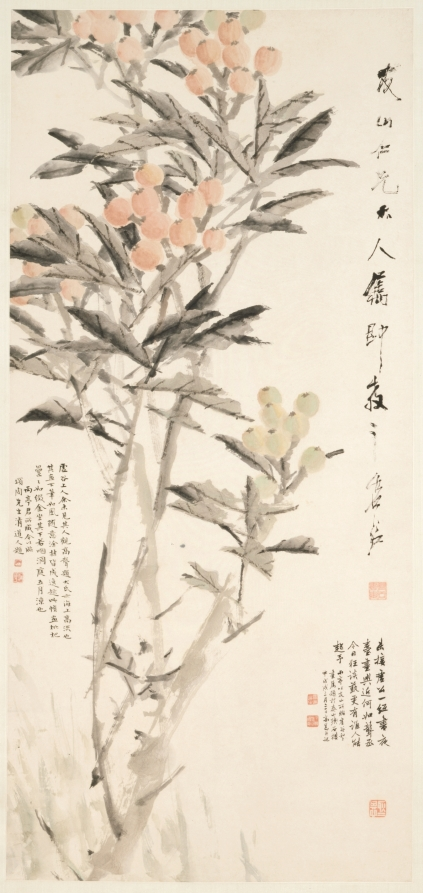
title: Pipa (Loquats)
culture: China, Yangzhou, Qing dynasty (1644-1911)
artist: Xugu (Chinese, 1823–1896)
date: c. 1888–89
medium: Hanging scroll; ink and color on paper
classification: Painting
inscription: 友山仁兄大人屬即教之，虛谷. [印]虛谷書畫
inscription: 未接虛公一經書2，夜臺畫興近何如。/ 聾丞今日狂談藝，更有誰人能起予。 雨亭以友山所貽虛谷和上畫屬，题於泰山殘石樓中，戊戌三日二十日，高邕并記。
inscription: 虚谷上人，余未見其人。觀高聾題大氏，亦海上高流也。其畫下筆如風，隨意涂抹，皆成逸趣。此幀畫枇杷纍纍如缀金，坐其下若咽洞庭五月涼也！ 雨亭君所藏，今以貽頌周先生。清道人題。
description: The loquat is a plant native to China that produces a juicy, yellow fruit in early summer. The artist may have intentionally extended the branches beyond the paper to emphasize the abundance of fruit. Xugu’s subjects of flowers, goldfish, and loquats express wishes for abundance and wealth, and must have appealed to his patrons. Xugu gave up his career as a military official during the Taiping rebellion (1850–64) and became an itinerant monk who painted for a living. He spent the later years of his life in Shanghai and his fame as an artist is associated with that city.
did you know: Xugu inscribed his painting on the right, dedicating it to a Mr. Youshan. Two additional inscriptions by other writers were added later, each time the painting changed owners.